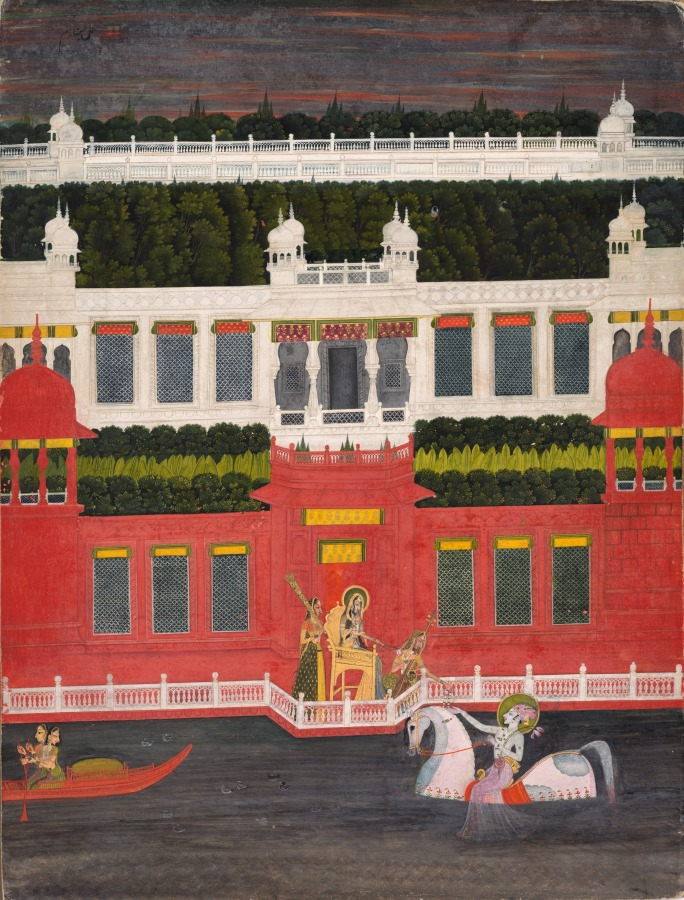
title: Krishna Receives a Flower Garland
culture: India, Rajasthan, Kishangarh School, 18th century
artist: Sitaram (Indian)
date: c. 1750–60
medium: Gum tempera, ink, and gold on paper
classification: Painting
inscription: upper left: amal-i Sitram